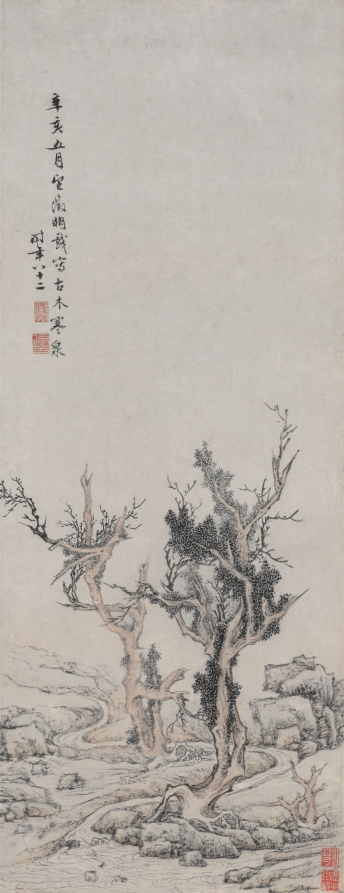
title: Old Trees by a Wintry Brook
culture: China, Ming dynasty (1368–1644)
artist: Wen Zhengming (Chinese, 1470–1559)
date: 1551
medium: hanging scroll, ink and light color on paper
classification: Painting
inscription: 辛亥五月望徵明戲寫古木寒泉 時年八十二 [印] 徵明; 停雲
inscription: 2 additional seals of Mou Yueqi 繆曰芑 (18th century).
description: Wen Zhengming was one of the most celebrated calligraphers and painters during the Ming dynasty (1368–1644). His inscription, gracefully written in small characters on the upper left corner, reveals Wen’s emotional mood at that moment of creation. "In the fifteenth day of the fifth month, the year of xinhai [1551], [I], Zhengming, playfully write this Old Trees by a Wintry Brook at eighty-two [sui]." How should we understand a wintery landscape painted in the middle of spring? Was it simply inspired by a surprisingly late spring snow? Or can it be that the “wintery” brook reflects the octogenarian’s feelings about aging and his inevitable, approaching mortality? The junipers’ gnarled forms are a poignant symbol of aging and suffering, yet the ink-dot leaves on some branches suggest that the trees are still alive, awaiting the warmth of spring.